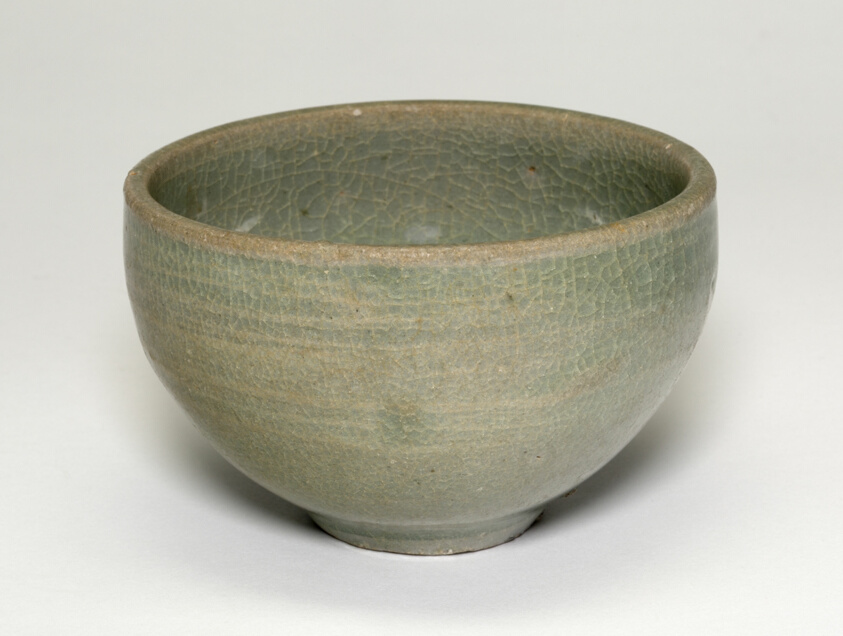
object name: Vessel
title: Cup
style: Korean (culture or style)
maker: Korea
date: Goryeo dynasty (918–1392), 14th century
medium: Celadon-glazed stoneware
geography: Korea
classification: drinking vessel; asian art; ceramics; vessel